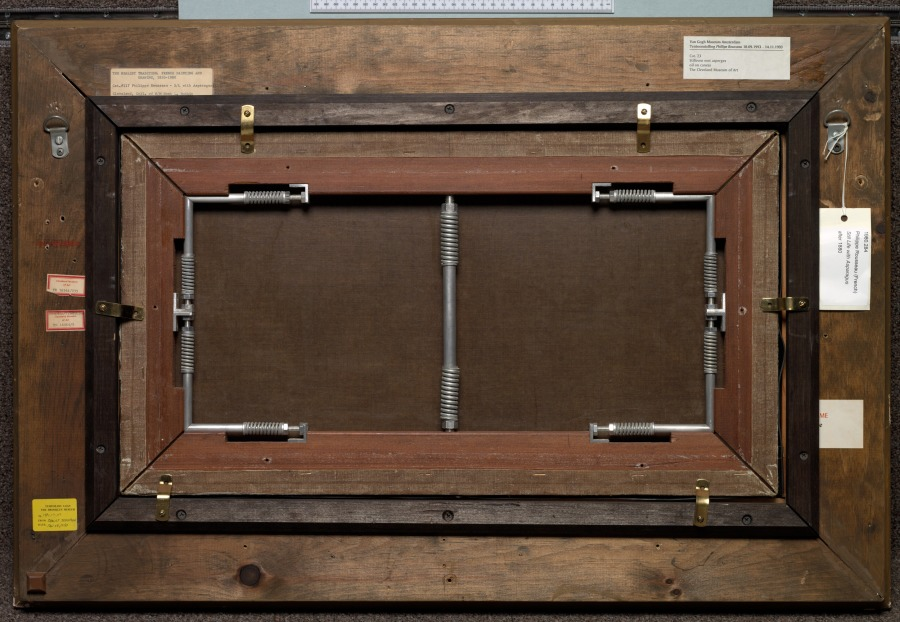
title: Still Life with Asparagus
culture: France, 19th century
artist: Philippe Rousseau (French, 1816–1887)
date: c. 1880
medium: oil on fabric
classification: Painting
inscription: Signed lower left: Ph. Rousseau. / à son ami A Arago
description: Rousseau was profoundly influenced by the atmospheric still lifes of Jean Siméon Chardin (1699-1779), whom the artist and other French painters like François Bonvin (1817-1877) rediscovered in the mid-1800s. A comparison with Chardin's work, also shown in this gallery, indicates that Rousseau similarly depicted foodstuffs on a simple kitchen table, concentrating on rich textures and restrained colors.